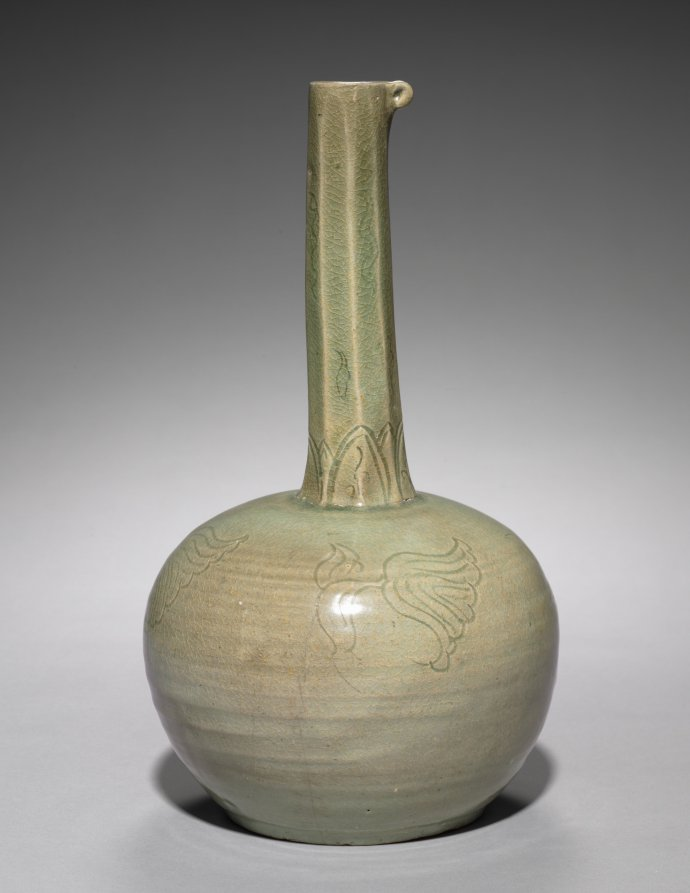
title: Long-necked Bottle with Incised Floral Design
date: 1100s–1200s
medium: celadon ware with incised and carved decoration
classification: Ceramic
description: Elites of the Goryeo period are known for their love of drinking tea and wine in various occasions, and commissioned a variety of serving wares such as this wine bottle. The shape of this bottle with a narrow, long neck and a spherical body is believed to have been first invented in 9th-century Chinese Yue kilns of Northern Zhejiang province.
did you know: This bottle with a narrow, long neck and a spherical body, which is missing its lid, was once used in ceremonial events to serve wine.